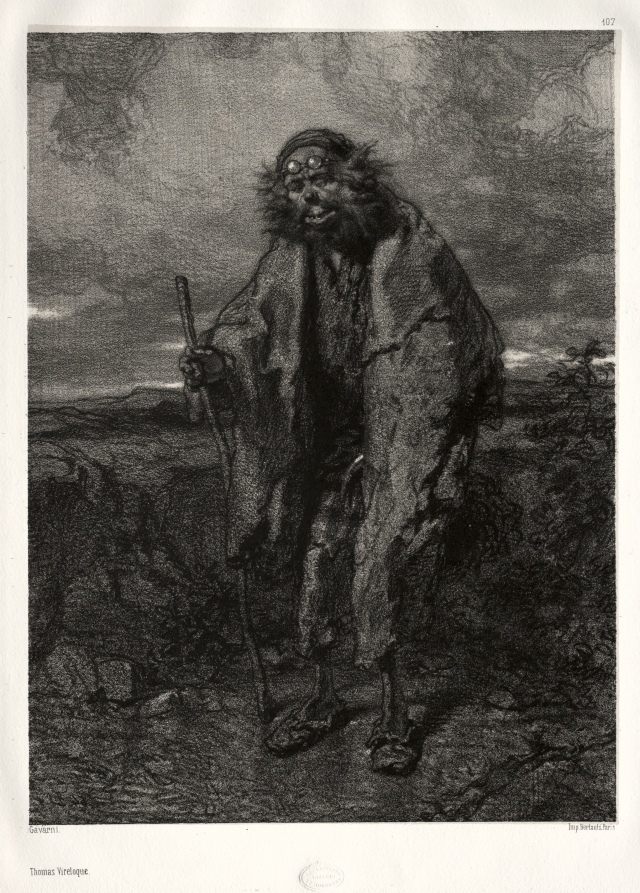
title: Old and Modern Artists: Thomas Vireloque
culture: France, 19th century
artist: Paul Gavarni (French, 1804–1866)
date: c. 1854–60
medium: lithograph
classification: Print